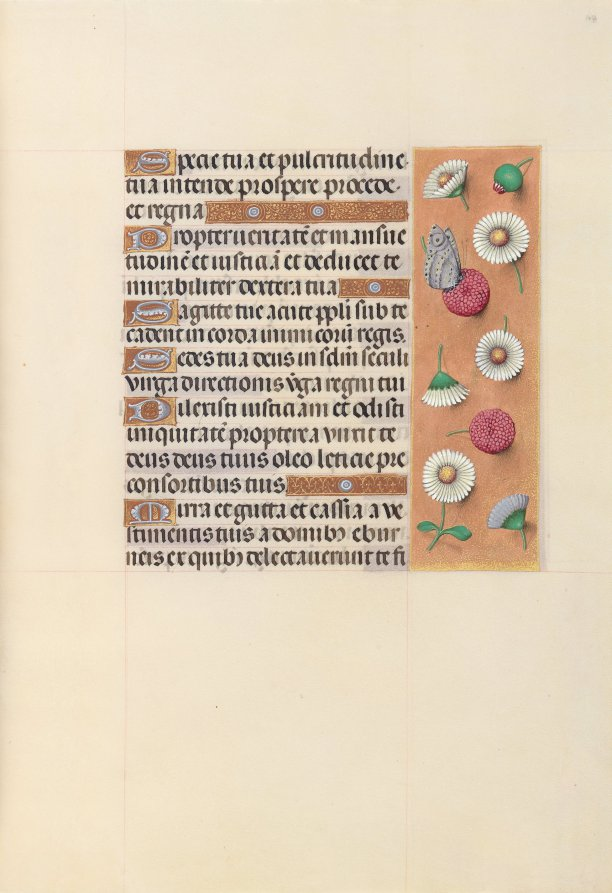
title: Hours of Queen Isabella the Catholic, Queen of Spain: Fol. 104r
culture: Flanders, Ghent and Bruges, late 15th century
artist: Master of the First Prayerbook of Maximillian (Flemish, c. 1444–1519)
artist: and Associates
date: c. 1500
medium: ink, tempera, and gold on vellum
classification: Bound Volume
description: This manuscript was illuminated by a circle of at least five highly organized manuscript painters active in the Flemish cities of Ghent and Bruges. The principal illuminator was Alexander Bening, who painted the majority of the book's miniatures. Manuscripts produced by this circle of artists are renowned for the decoration of their borders, which typically feature a rich variety of realistically-painted flowers, birds, and butterflies. This prayer book, called a book of hours, was intended not for a cleric, but for the private devotions of a lay person-in this case, Isabella the Catholic, Queen of Spain (1451-1504). Isabella's coat of arms embellishes the book's frontispiece. It is unlikely that the book was commissioned by the Queen herself; rather, she probably received it as a diplomatic gift from someone courting her patronage, perhaps Cardinal Francisco Jimenez de Cisneros. A Franciscan friar, Jimenez was dependent upon Isabella for his advancement, first to the post of Queen's confessor in 1492, and then to Archbishop of Toledo in 1495.